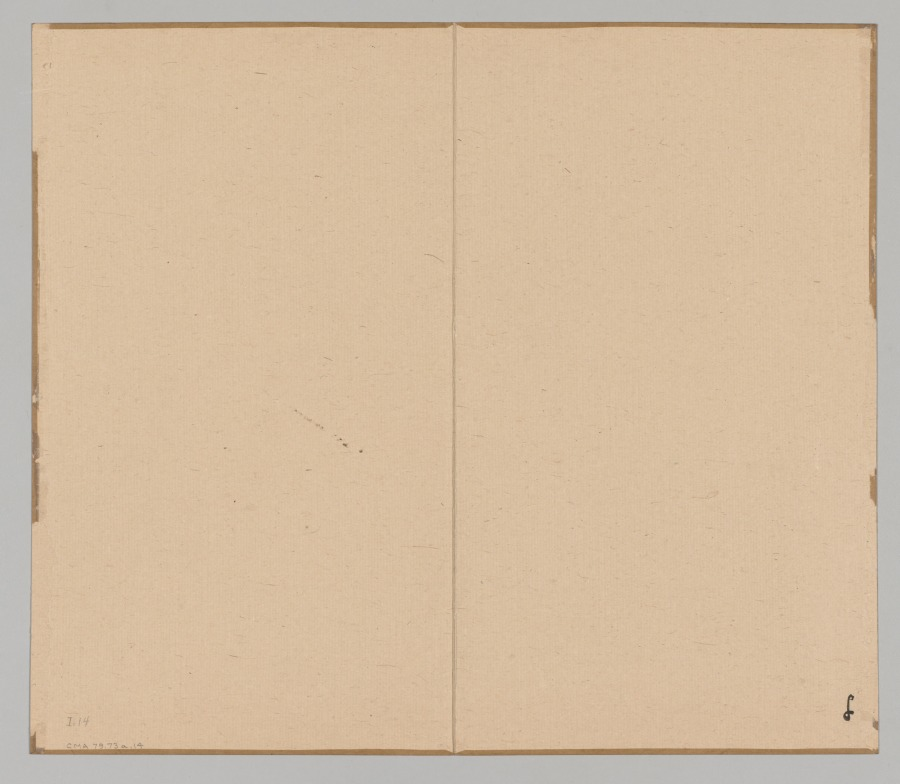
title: Reverberations of Taiga, Volume 1 (leaf 14)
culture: Japan, Edo period (1615–1868)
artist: Aoki Shukuya (Japanese, d. 1802)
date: mid- to late 1700s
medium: double-leaf from a pair of albums; ink and light color on paper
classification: Portfolio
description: Traditionally, young painters in Japan began their studies with an established master-painter. The master's compositions invariably became models that the apprentice copied to learn various ink and brush techniques. Shukuya was a pupil of the famous Kyoto artist Ikeno Taiga, whose style is reflected in these sketches of rocks, trees, and mountains.